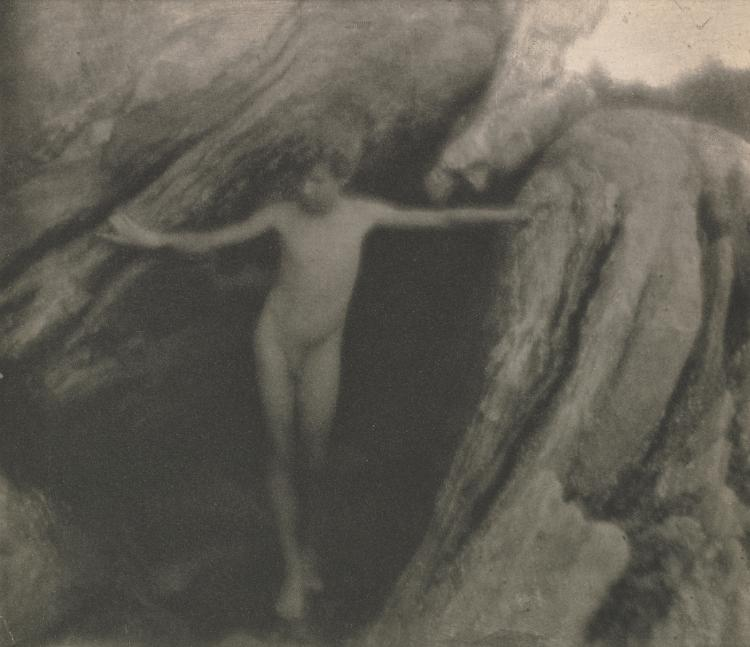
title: Camera Work: Nude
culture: America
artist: Clarence H. White (American, 1871–1925)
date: 1908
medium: photogravure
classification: Bound Volume